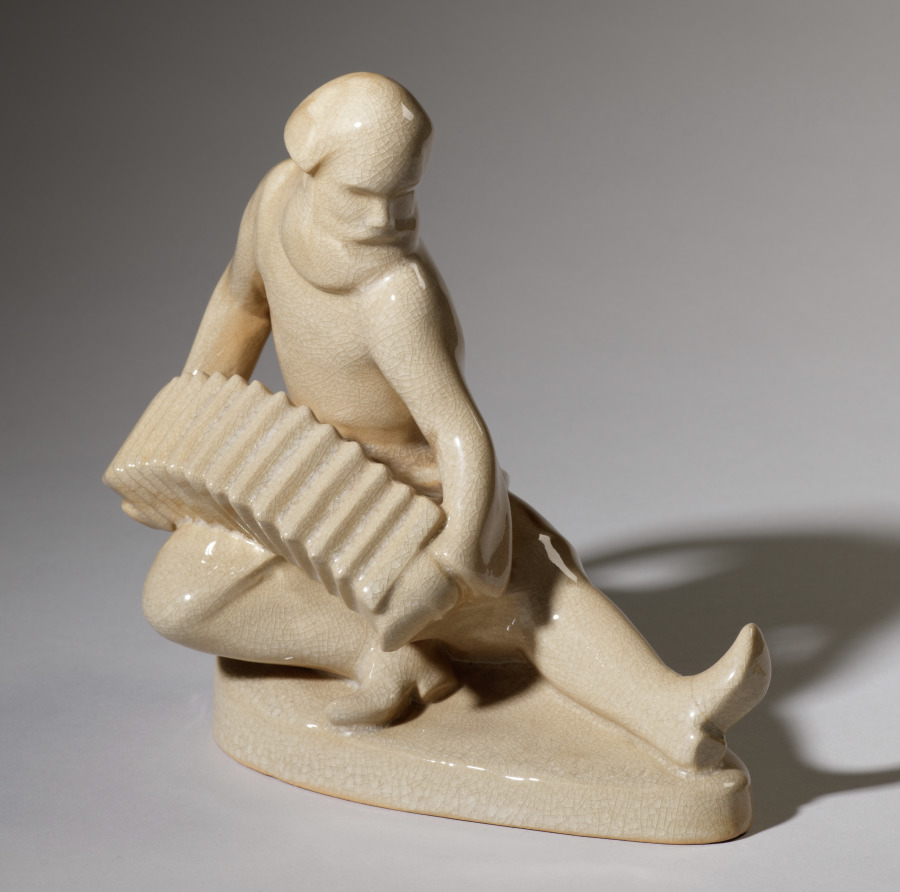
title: Accordion Player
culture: America, Ohio, Cleveland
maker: Cowan Pottery Studio (America, Rocky River, Ohio, 1920–1931)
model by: Alexander Blazys (American, born Russian Empire [now Lithuania], 1894–1963)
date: 1927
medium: mold-made ceramic, glazed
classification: Ceramic